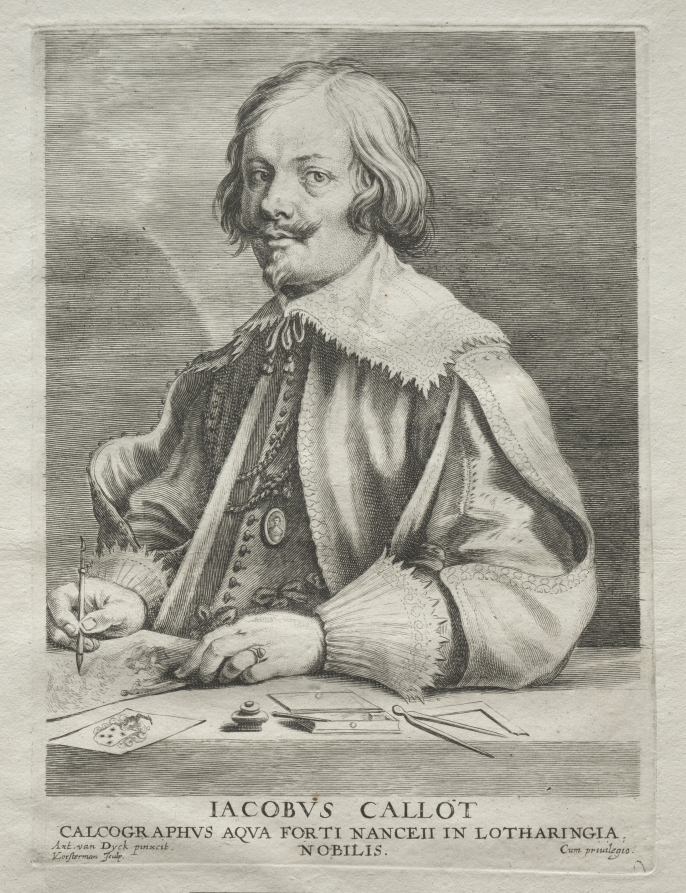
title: Jacques Callot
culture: Flanders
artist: Lucas Emil Vorsterman (Flemish, 1595–1675)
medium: engraving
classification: Print